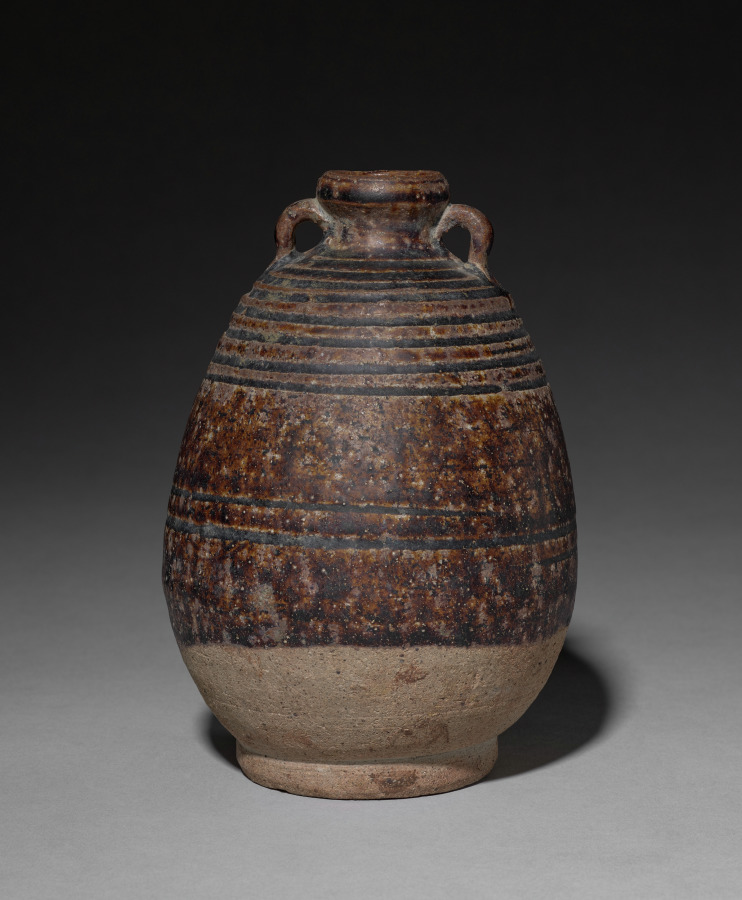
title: Bottle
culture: Siam, Sawankhalok ware, late 13th-14th Century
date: late 1200s-1300s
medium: stoneware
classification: Ceramic